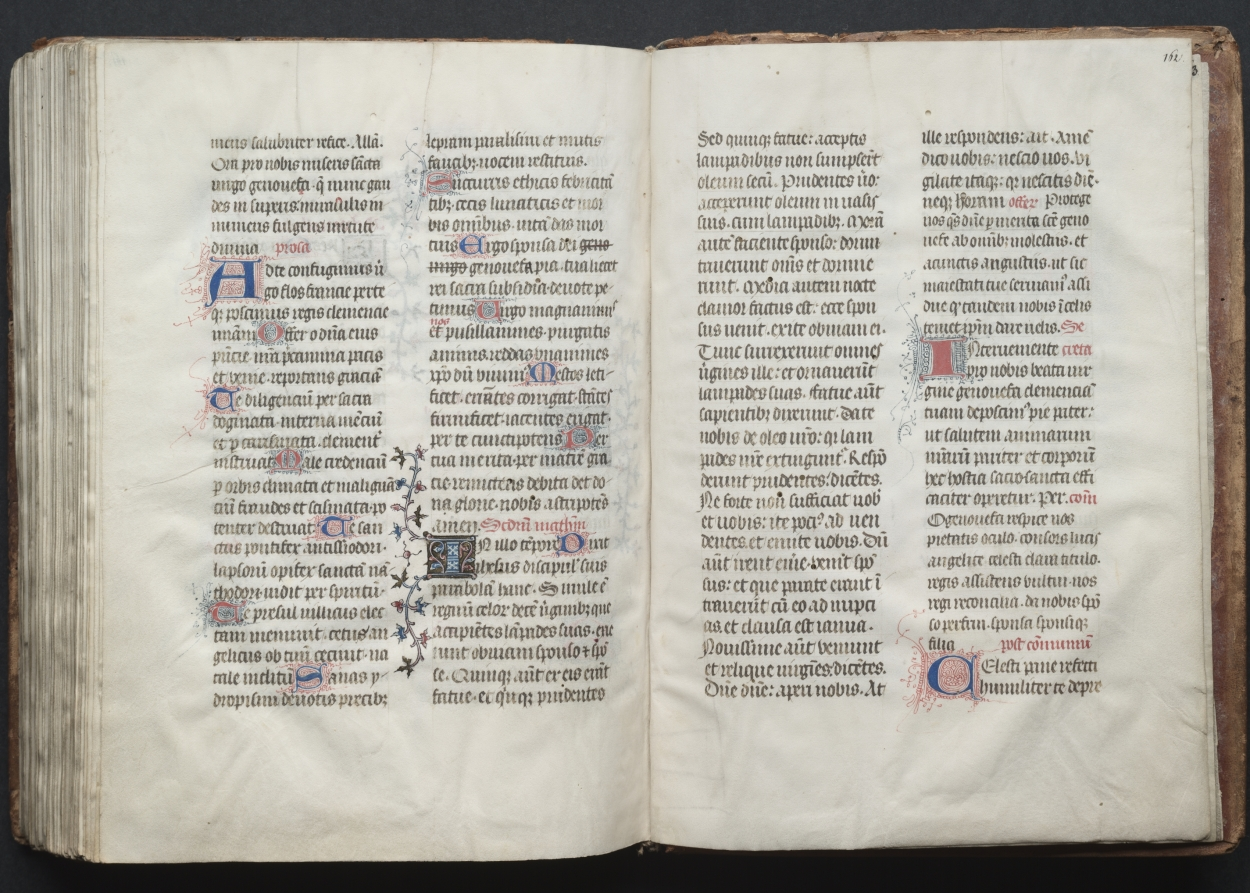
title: The Gotha Missal: Fol. 162r, Text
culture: France, Paris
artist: Master of the Boqueteaux (French)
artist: and Workshop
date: c. 1375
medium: ink, tempera, and gold on vellum; blind-tooled leather binding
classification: Bound Volume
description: The style and quality of this manuscript's decoration is typical of deluxe Parisian books made for aristocratic or royal patrons. Most of the book's decoration appears to be the work of the Master of the Boqueteaux, an artist active at the court of King Charles V (died 1380). His style was apparently shared by a number of book illuminators working in and around Paris. It is very possible that the Gotha Missal belonged to Charles V, but is not provable because the manuscript has no royal portraits and lacks a colophon. Given the book's magnificent decoration, however, it would seem that it was produced for a Valois prince, if not for the king himself. The manuscript receives its name from the German dukes of Gotha, its later owners.